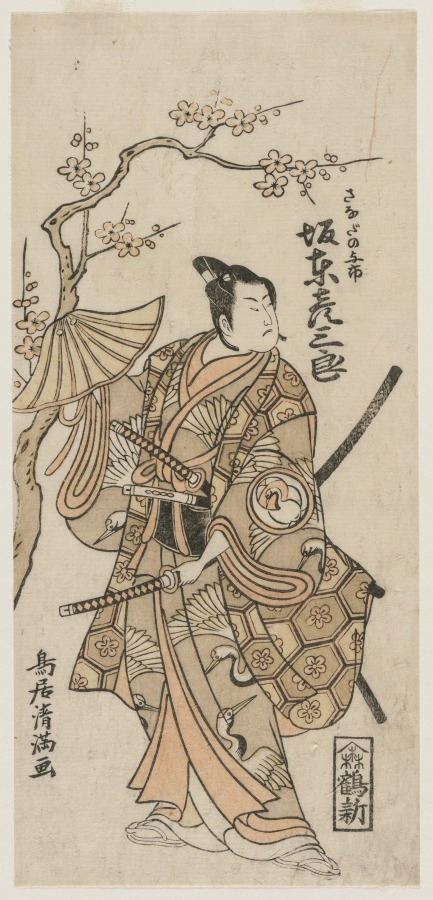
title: Bando Hikosaburo II as Sanada no Yoichi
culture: Japan, Edo period (1615–1868)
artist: Torii Kiyomitsu (Japanese, 1735–1785)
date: early 1760s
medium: color woodblock print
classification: Print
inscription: Signature: Torii Kiyomitsu ga Publisher: Tsurushin (emblem)